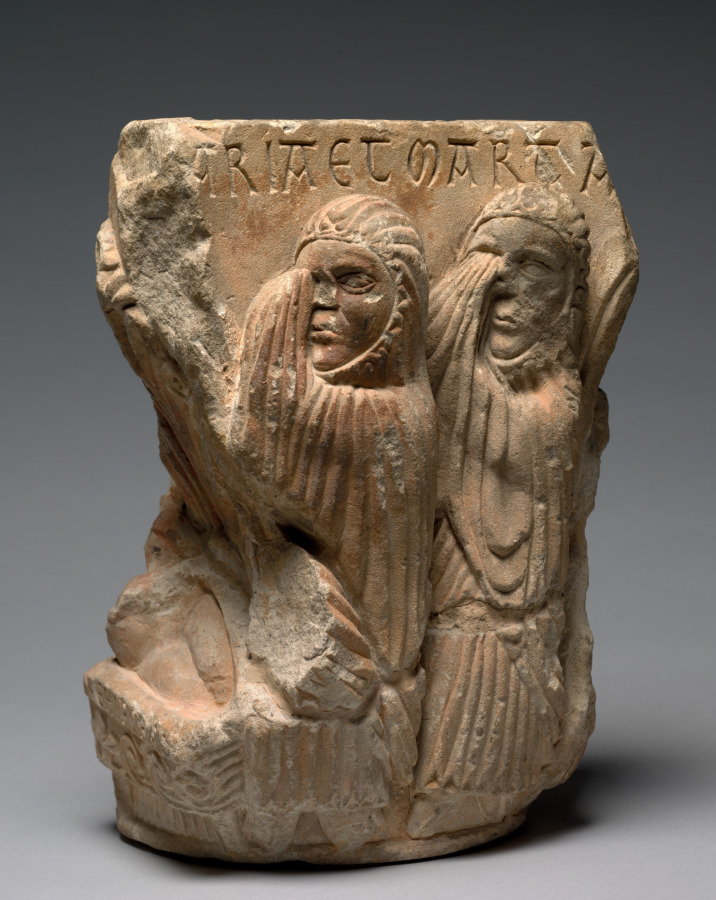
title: Fragment of a Double Capital: Mary and Martha at the Raising of Lazarus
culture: Southwest France, Ariège, region of Foix, mid-12th century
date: 1145–1165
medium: quartz sandstone with traces of polychromy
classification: Sculpture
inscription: inscription above the draped figures of Mary and Martha: "MARIA ET MARTA"; to the left of the two figures is a portion of a decorated sarcophagus depicted in the lower half with an inscription of Christ's words: "VENI FORAS" ([Lazarus] come forth).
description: The front face of this capital fragment presents the two mourning women identified by the inscription above: MARIA ET MARTA. On the left face appears the body of Lazarus in a sarcophagus bearing Christ's words: VENI FORAS ("[Lazarus], come forth" [John 11:43]). The Raising of Lazarus is one of the most popular themes in Christian art. This miracle represents Christ's power over death and thus prefigures the Resurrection. It also speaks of the hope of resurrection for all individuals, a common theme in early Christian catacombs and sarcophagi. The subject is less prevalent in sculpture of the Romanesque period, though quite popular in other media.